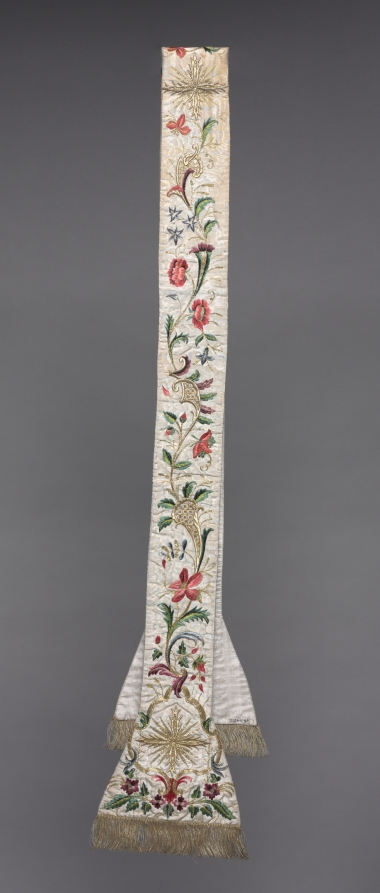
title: Embroidered Stola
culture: Italy or Spain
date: 1700s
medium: silk and metal on satin: embroidery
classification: Embroidery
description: A beautiful design emanates from a vase in the center, displaying symmetrical flora that extend across embroidered gold braids into graceful curvilinear cartouches, reflecting contemporary architectural decoration. Also in the center, sheaves of wheat and grapes represent the bread and wine of the Mass. Gold sequins within thread-outlined squares illustrate fine quality workmanship. The decoration of the stole and chalice veil is similar to the chasuble, also on moiré (watered) silk fabric. The stole, an insignia of the office of deacons and priests, is worn under a chasuble, and the chalice veil—bearing the monogram of Jesus Christ, IHS, in the center—covers the chalice and paten (the plate holding the Eucharistic bread).